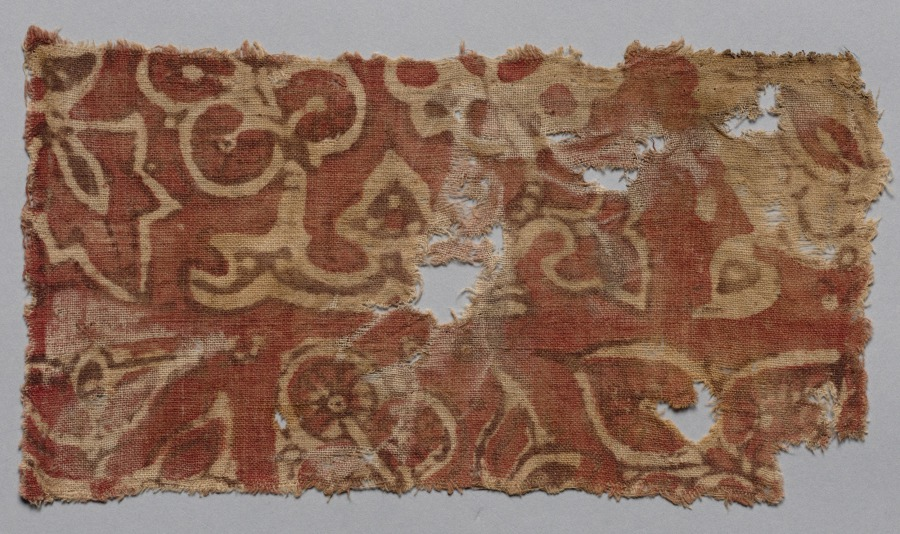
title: Fragment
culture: India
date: 1100s–1300s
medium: cotton: plain cloth, resist dyed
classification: Textile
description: This fragment has a pattern of stylized plant forms. The design was achieved by applying wax to design areas and then dipping it in red madder dye with use of mordant. The brown color was produced by the presence of iron in the mordant used for those areas.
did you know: The fabric was dyed with madder and indigo.